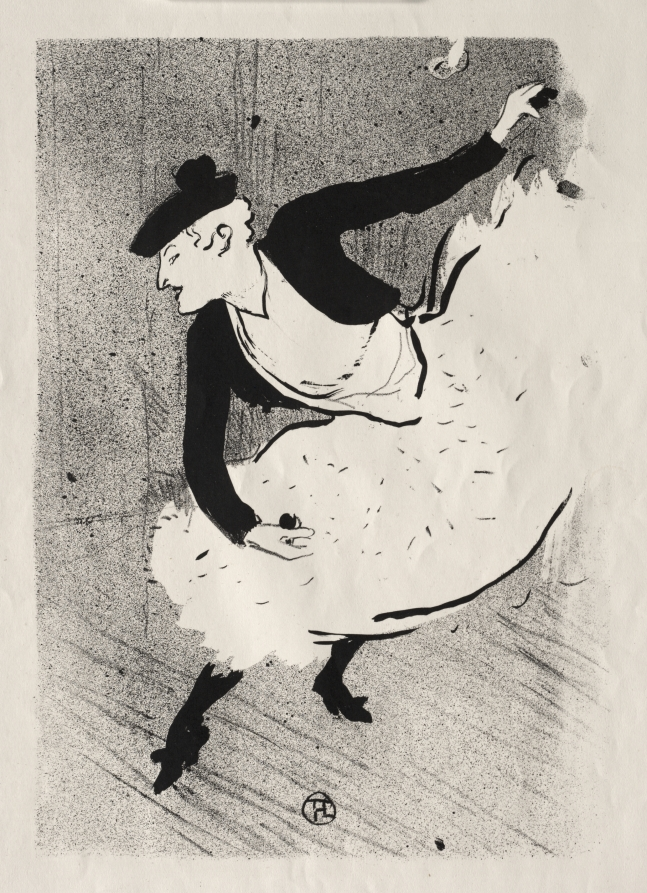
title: Le Café-concert: Edmée Lescot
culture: France, 19th century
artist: Henri de Toulouse-Lautrec (French, 1864–1901)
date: 1893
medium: lithograph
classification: Print